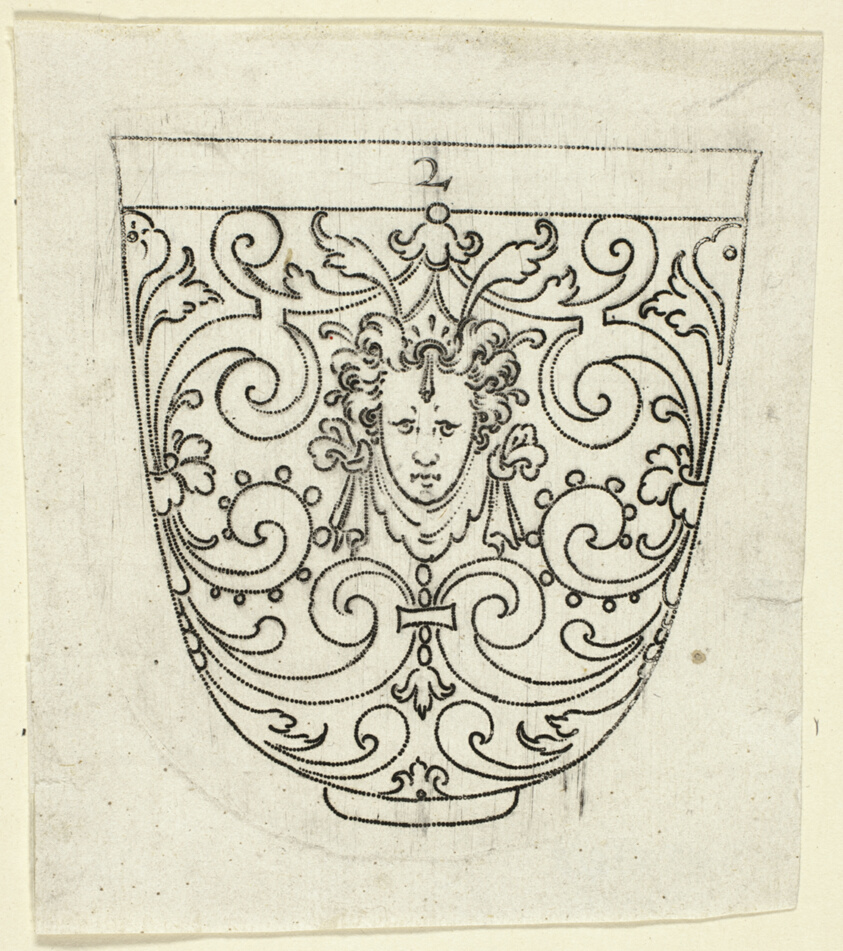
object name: Print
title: Plate 2, from XX Stuck zum (ornamental designs for goblets and beakers)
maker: Master A.P. (German, active early 17th century)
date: 1601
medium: Punch engraving in black on ivory laid paper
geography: Germany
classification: engraving; print; prints and drawing